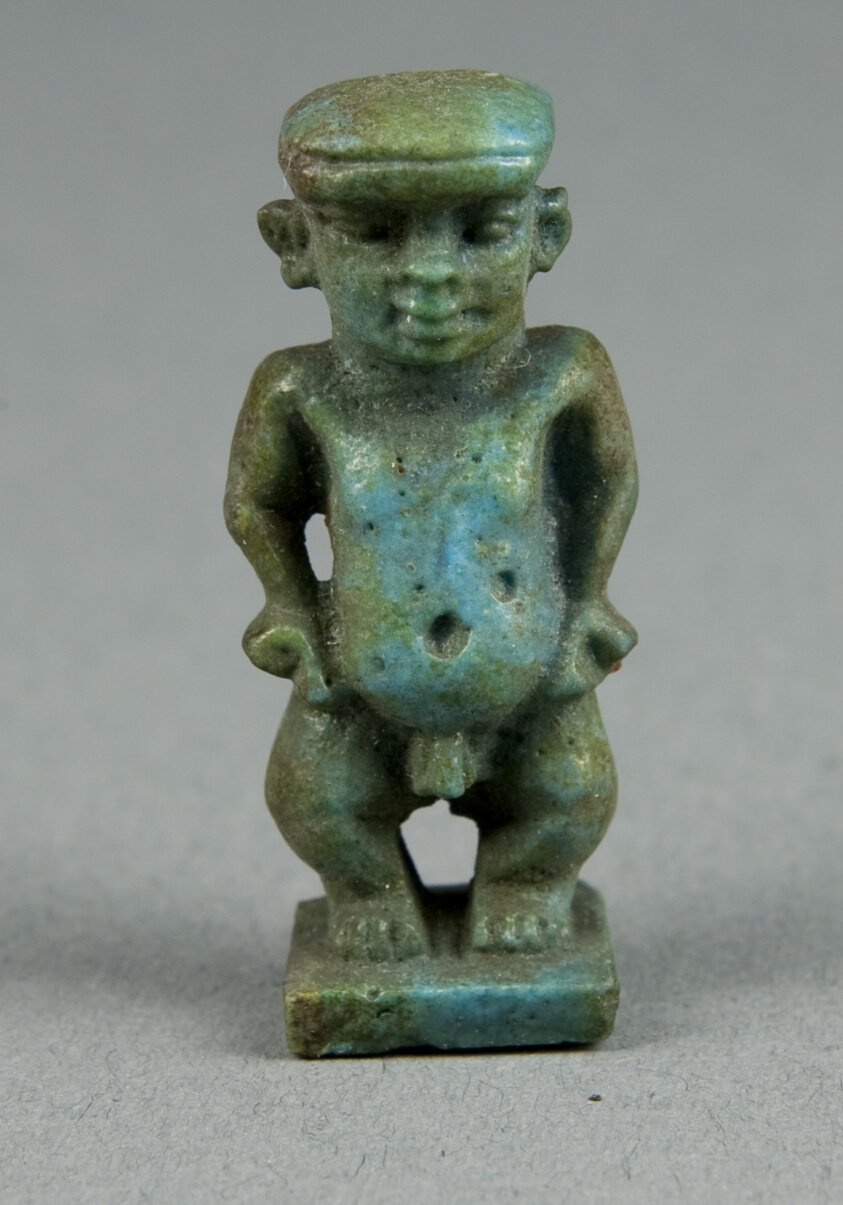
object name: Costume and Accessories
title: Amulet of the God Pataikos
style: egyptian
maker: Egyptian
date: Late Period, Dynasties 26–31 (664–332 BCE)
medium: Faience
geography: Egypt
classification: amulet; jewelry; ceramics; ancient art; costume; faïence (composite material)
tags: gods (deities)